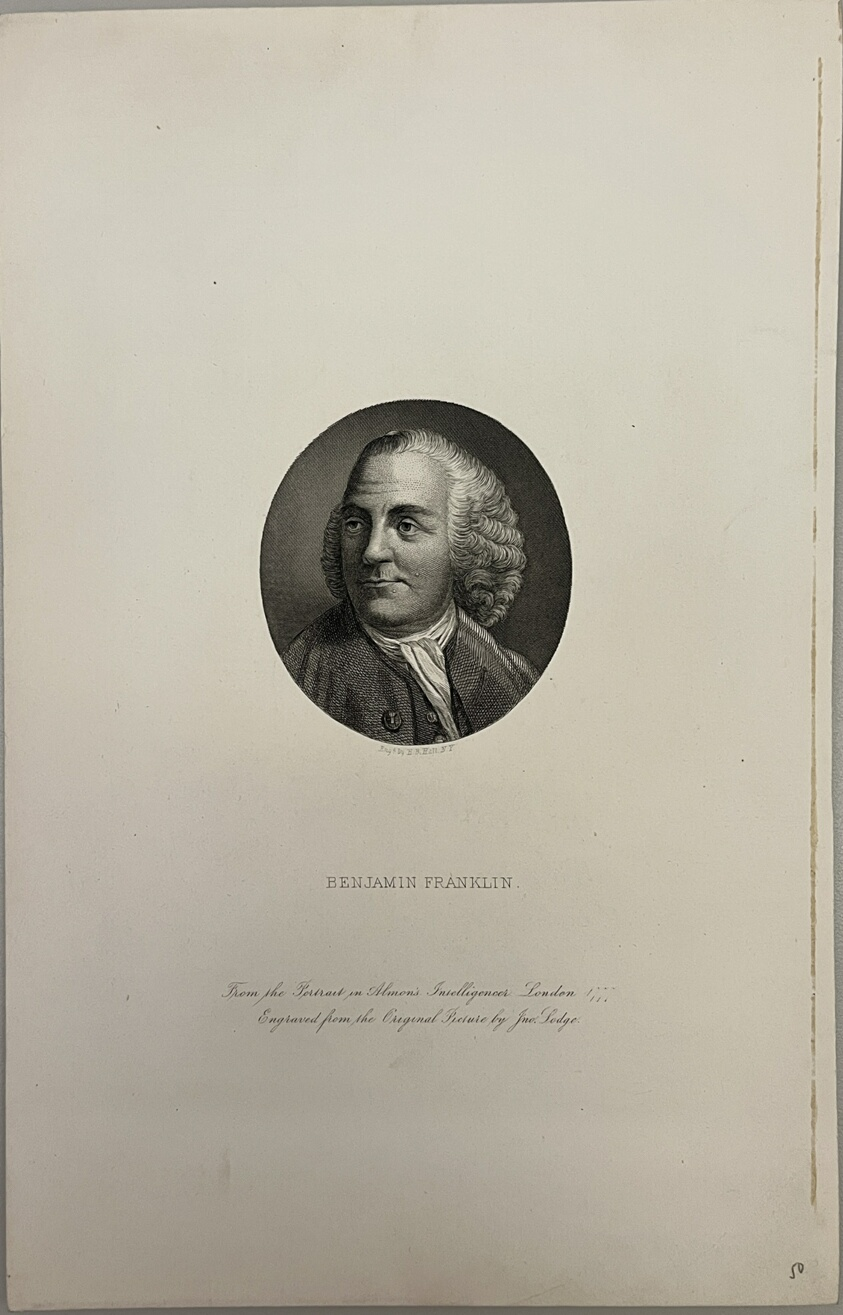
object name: Print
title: Benjamin Franklin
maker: Henry Bryan Hall (American, 1808-1884); after John Lodge (British, active from 1782-died 1796)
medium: Steel engraving on paper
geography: United States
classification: reproduction; print; prints and drawing